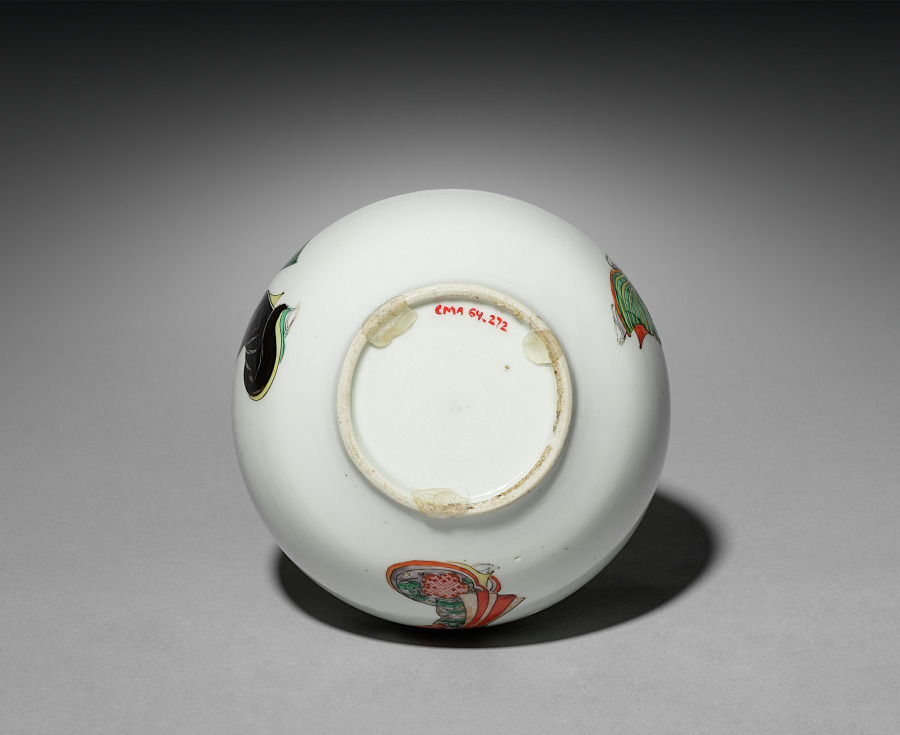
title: Sake Bottle with Three Figures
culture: Japan, Edo period (1615–1868)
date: late 1700s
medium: porcelain with overglaze enamel and gold decoration (Hizen ware, Arita type)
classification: Ceramic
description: The bottle features three elegantly drawn figures: a beautiful woman, a young man, and a priest. The artist used a fine-haired brush to draw these figures in colored enamel onto the porcelain bottle, which had already been given a clear glaze. A final firing fused the enamel to the form. The name derives from the port of Imari from where Japanese porcelains were shipped to other cities in Japan, China, and Europe.